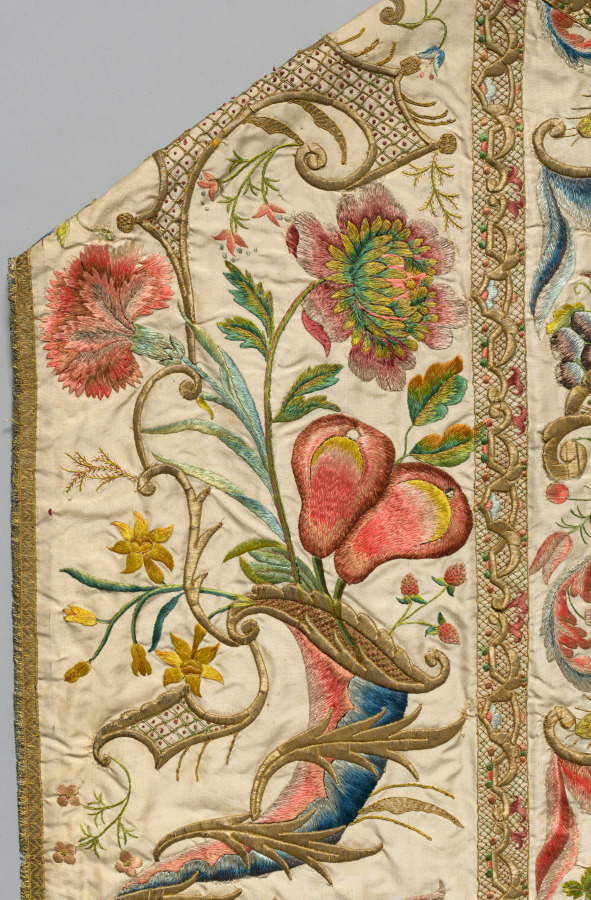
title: Chasuble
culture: Italy or Spain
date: 1700s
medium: Silk and metallic threads: embroidery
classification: Embroidery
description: The chasuble’s exquisite symmetrical decoration highlights its central panel where three illusionary gold containers hold skillfully shaded fruit in pastel silk tones. Delicately curving motifs enhance the side panels along with finely stitched strawberries in so-called French knots. This liturgical chasuble and other vestments, worn over a white alb with lace, were embroidered by professional specialists, such as experts who shaded colored silks or secured gold thread, in early versions of assembly lines that were usually in secular workrooms or in convents. The church or commissioner supplied the raw materials and paid a fee for the work.